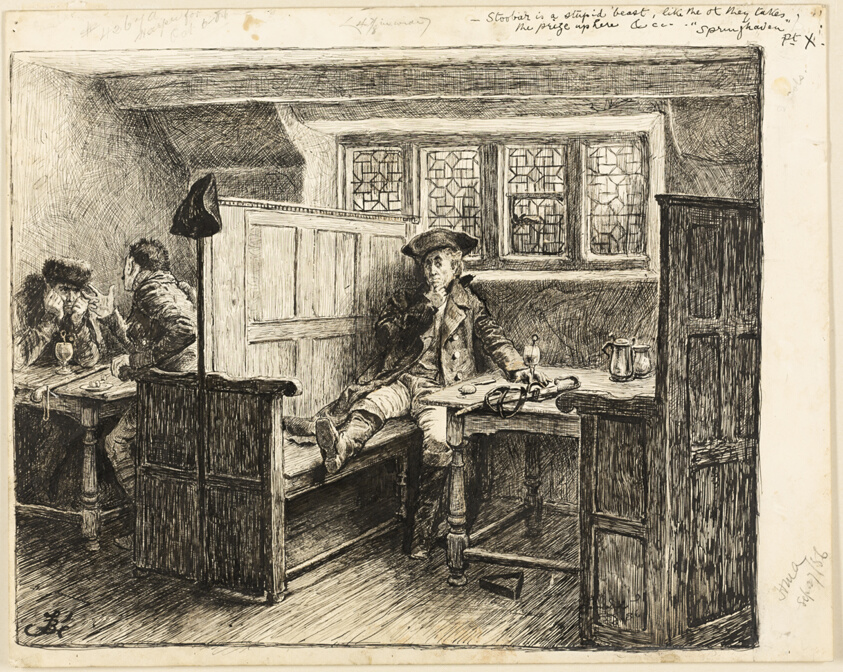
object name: Drawing and Watercolor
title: The Eavesdropper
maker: Frederick Barnard (English, 1846-1896)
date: c. 1886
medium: Pen and black ink, heightened with varnish, on ivory wove card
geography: England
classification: pen and ink drawings; drawings (visual works); prints and drawing